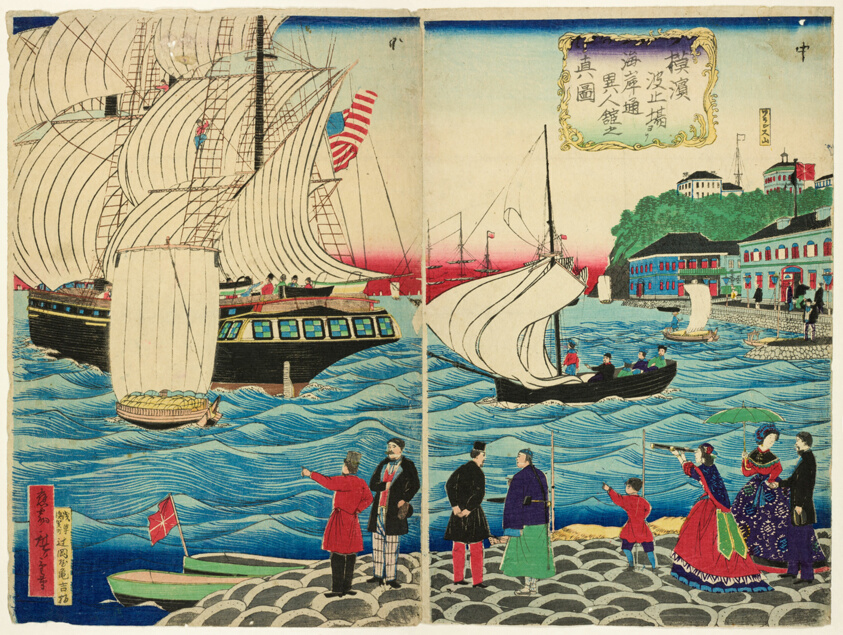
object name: Print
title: True View of the Foreign Buildings along the Waterfront Seen from the Yokohama Wharves (Yokohama hatoba yori kaigandori ijinkan no shinzu)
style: Japanese (culture or style)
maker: Utagawa Hiroshige III (Japanese, 1842-1894)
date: c. 1875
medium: Color woodblock print; two sheets of oban triptych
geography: Japan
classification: woodblock print; print; asian art